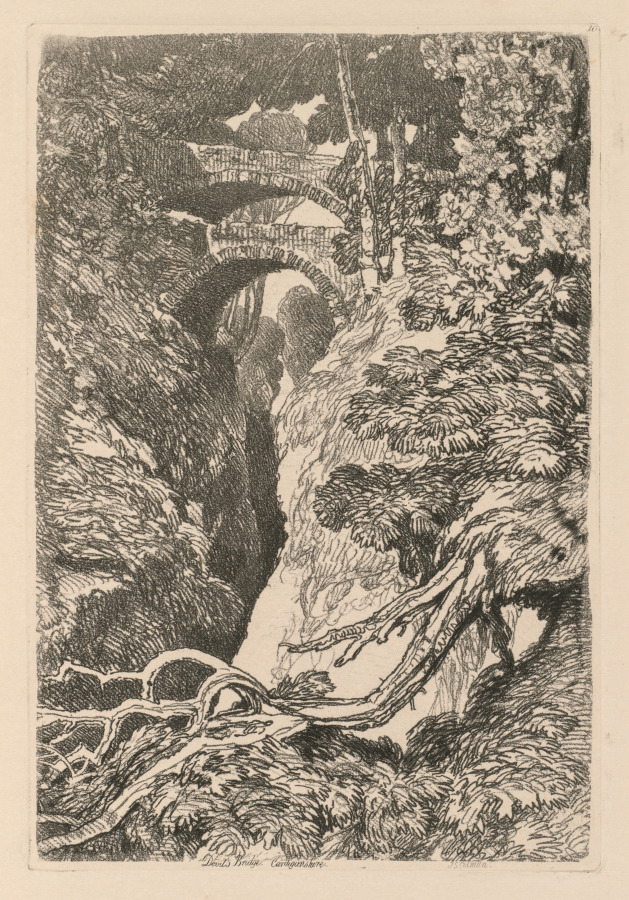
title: Liber Studiorum: Plate 10, The Devil's Bridge, Cardinganshire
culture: England, 19th century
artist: John Sell Cotman (British, 1782–1842)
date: 1838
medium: softground etching, from a bound volume containing 48 plates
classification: Bound Volume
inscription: In plate, within image, upper right: 10; in plate, partially within image, Devil's Bridge, Cardinganshire; in plate, below image, J S Cotman